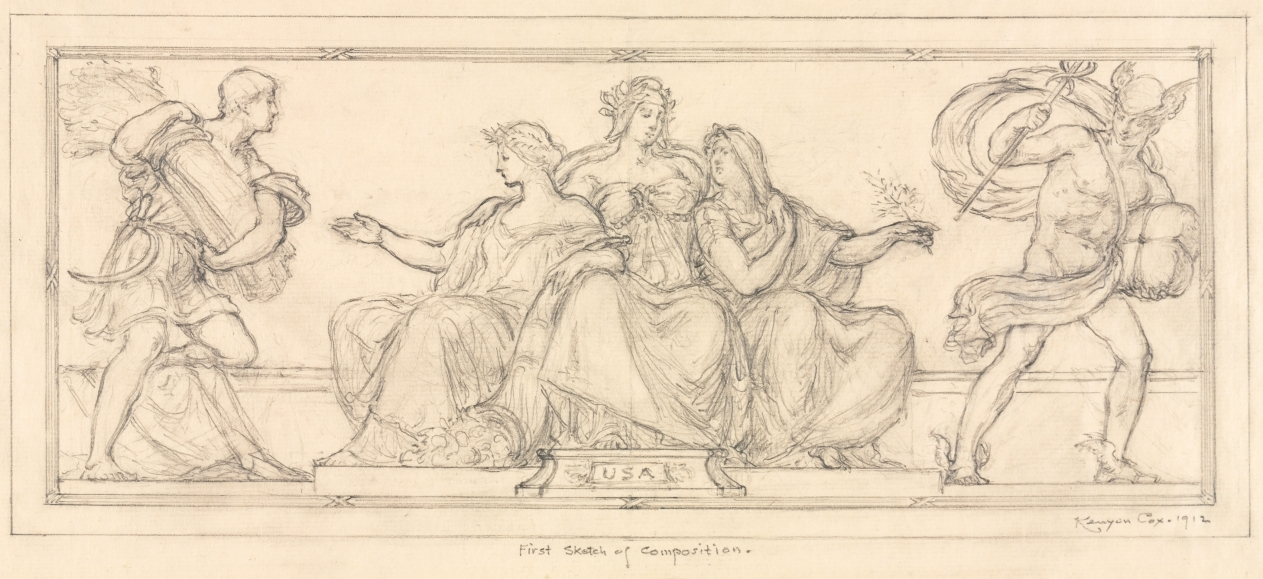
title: Design for United States Currency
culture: America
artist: Kenyon Cox (American, 1856–1919)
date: 1912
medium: graphite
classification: Drawing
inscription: signed, lower right, in graphite: Kenyon Cox. 1912 ; by artist, lower center, in graphite; First Sketch of Composition. ; by unknown hand, lower right, in graphite: 11 x 19 1/2 15 x 23 1/2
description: The painter and muralist Kenyon Cox viewed himself as the heir to the great traditions of the Italian Renaissance and vigorously led the resistance to all forms of modern painting. This design for U. S. currency, which was rejected by the government, shows the care with which he planned his compositions. Cox's son, Allyn, who also became a successful mural painter, posed for the male figure. Cox's brother, J. D. Cox, a prominent civic leader in Cleveland, played an active role in the formation of the Cleveland Museum of Art. He gave the museum the three works by his brother that are in this exhibition.